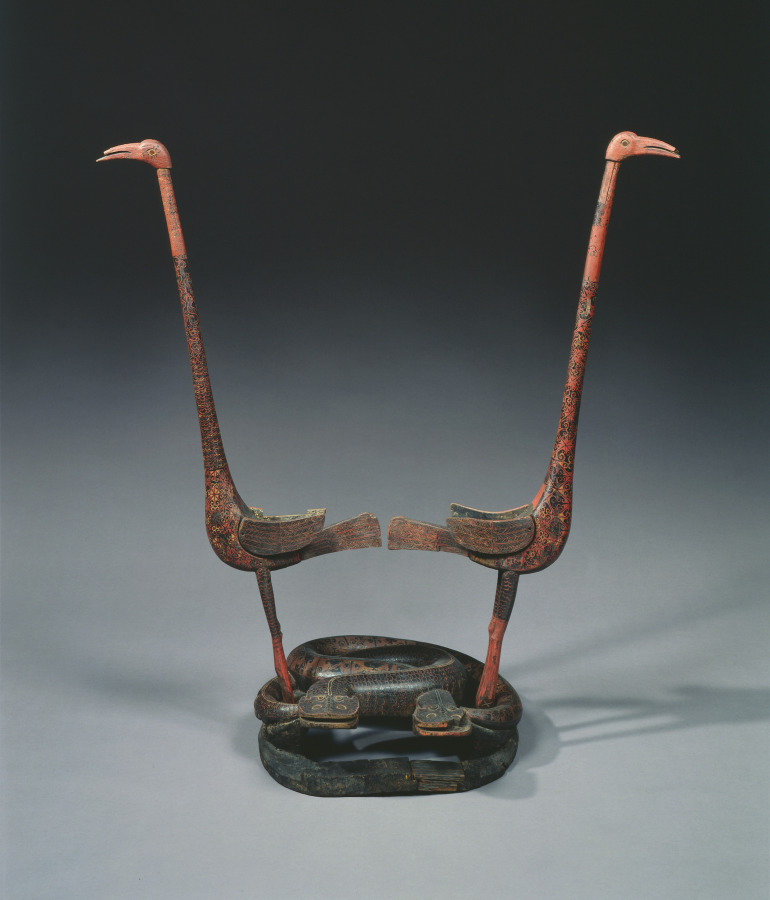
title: Cranes and Serpents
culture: China, reportedly from Hunan province, Changsha, Warring States period (475–221 BCE), State of Chu (c. 1046–223 BCE)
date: 475–221 BCE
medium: lacquered wood with polychromy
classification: Sculpture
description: A different style of ritual art developed in the state of Chu in South China. In addition to bronze vessels, lacquered wood artifacts expanded the repertory of ritual implements. This extraordinary sculpture was probably a drum stand for supporting a suspended drum in ritual ceremonies. It is unique among other excavated drum stands of the Chu, which typically show two birds standing on tigers. The theme of the bird stepping on the serpent was common in the Chu visual culture. Yet the slender proportions and seemingly flimsy structure of this particular set raise the question of whether it was utilitarian or mostly served symbolic functions in the tomb. The birds' and serpents' bodies have designs painted in red lacquer and yellow pigment against the black lacquer. Scientific analyses confirm the additional use of a blue or green pigment that has been discolored over time.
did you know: The cranes' long necks allowed a lightweight drum to be suspended from strings through the beaks, while the densely intertwined snakes provided a weighty base to stabilize the object during musical performances.